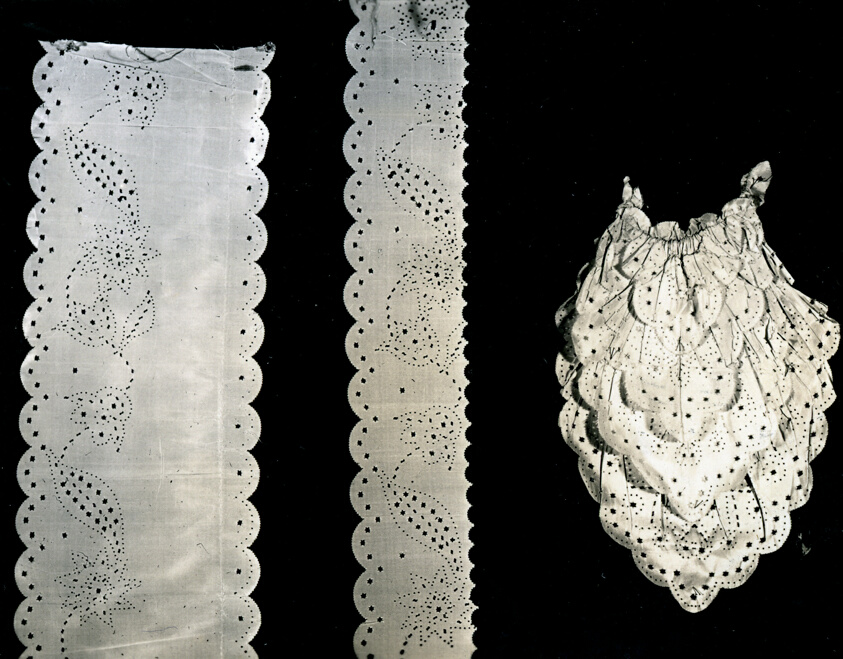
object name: Textile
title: Ruffle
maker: France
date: 1758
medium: White taffeta with cut work pattern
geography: France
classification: textile; weaving